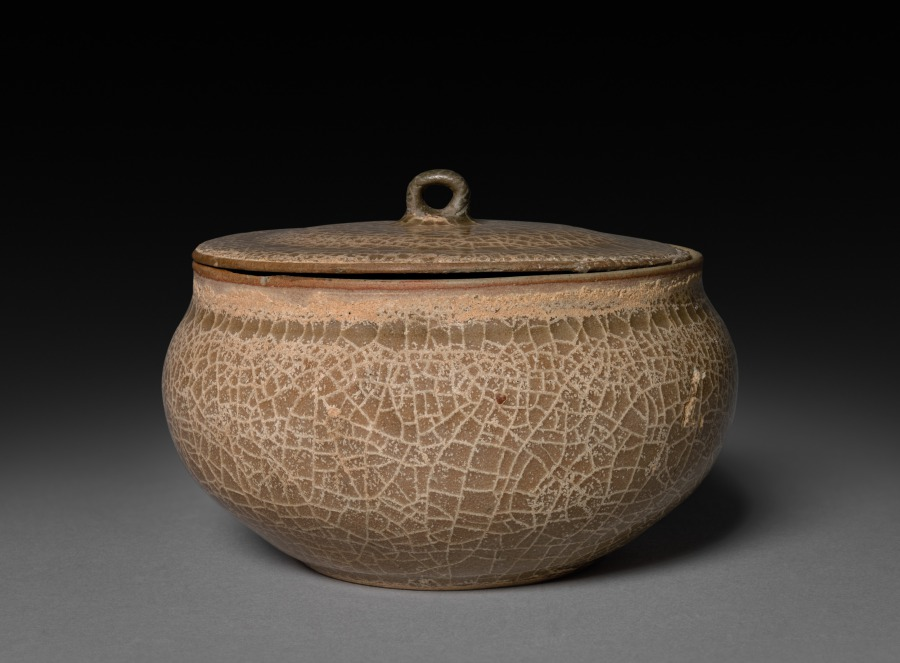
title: Covered Flat Jar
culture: China, Hangzhou, Suburban Altar Kiln, Southern Song dynasty (1127-1279)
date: 1127–1279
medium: glazed buff stoneware, Guan ware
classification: Ceramic